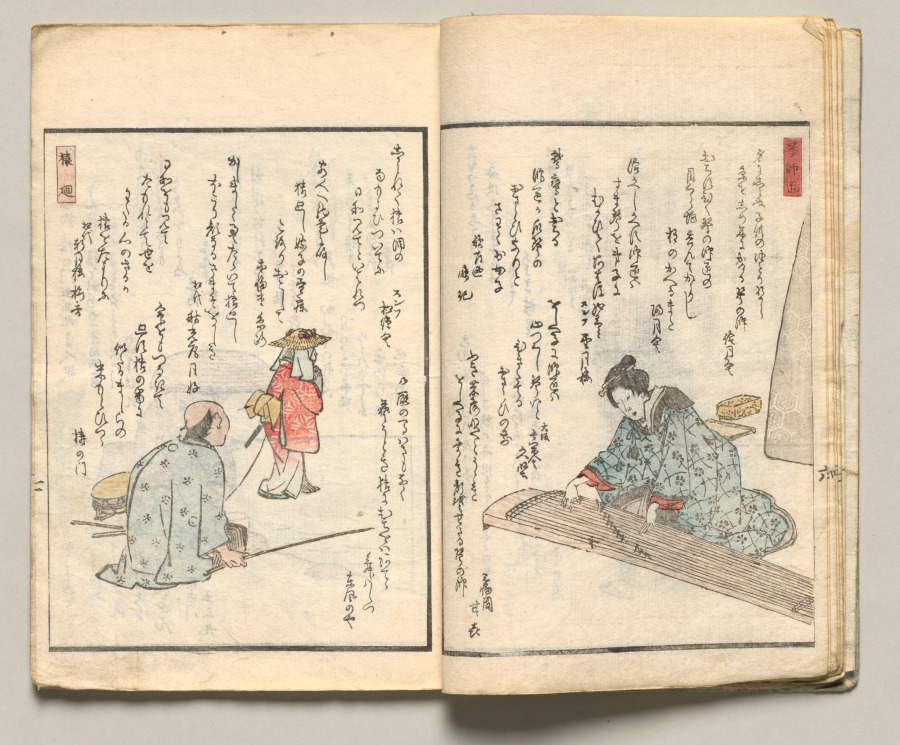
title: Spread Seven from Volume Six of People of Japan in Light Verse (Kyōka)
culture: Japan, Edo period (1615–1868)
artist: Utagawa Hiroshige (Japanese, 1797–1858)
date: 1857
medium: Woodblock-printed book; ink and color on paper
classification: Bound Volume